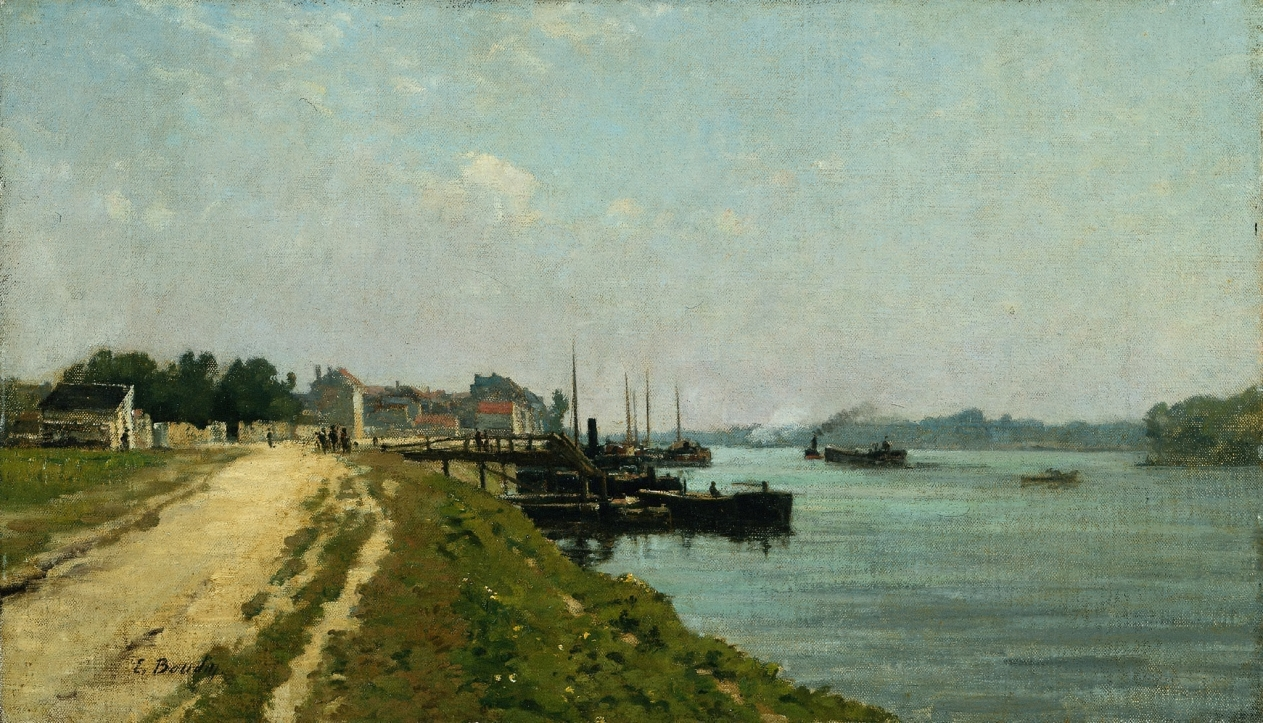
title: Banks of the Seine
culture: France, 19th century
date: not dated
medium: oil on fabric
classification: Painting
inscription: Signed lower left: E. Boudin [originally done in brown paint; has been abraded and reinforced in black]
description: Although this scene was once thought to have been painted by Eugéne Boudin (1824–1898), its creator has yet to be identified.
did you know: The Seine River, especially the mid-Seine valley where Claude Monet lived, is known for being a source of inspiration and subject matter for Impressionist and Post-Impressionist artists.